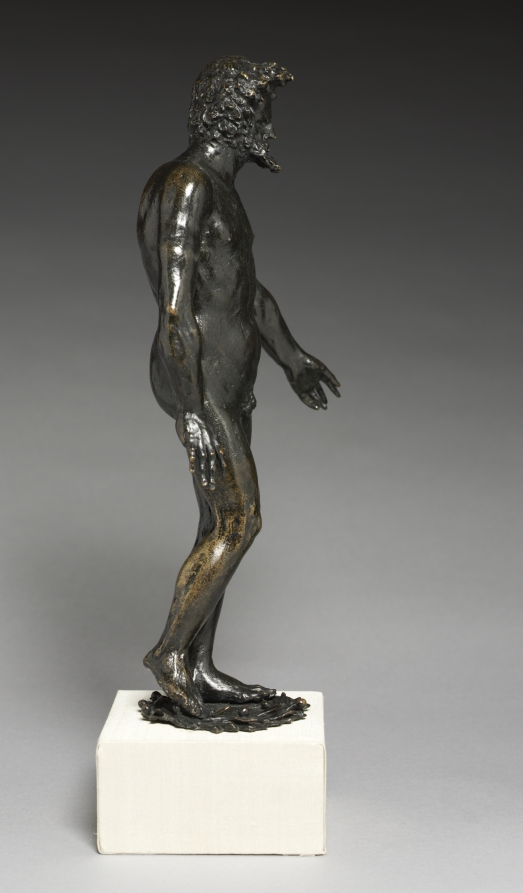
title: Standing Figure of a Man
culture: Italy, Siena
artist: circle of Francesco di Giorgio Martini (Italian, 1439–1501)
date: c. 1500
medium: bronze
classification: Sculpture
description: Derived from classical antiquity, this nude male stands in the contrapposto pose, bearing his weight on his left leg, with his right leg bent, as if in motion. He steps lightly, so that only the toes of his right leg touch the ground. He stands on a laurel wreath, a plant which in antiquity would be waved as a symbol of joy after a military victory. During the Renaissance, small bronzes were kept in cabinets, bringing the gods and goddesses of ancient times into the home. Flaws in the bronze casting suggest that this piece is from the early Renaissance. In 1971, Ulrich Middeldorf rejected Olga Raggio's original attribution to an anonymous Florentine, attributing it instead to the sixteenth-century Sienese artist Francesco di Giorgio Martini (1439-1501), based partly on its resemblance to Francesco's bronze angels in Siena's Duomo. However, such details as the awkward posture and frozen motion of the body relate this work more closely to Francesco's pupil Giacomo Cozzarelli (1453-1515). Standing Figure of a Man is attributed to the circle of Francesco di Giorgio Martini, as uncertainties remain regarding its exact author.